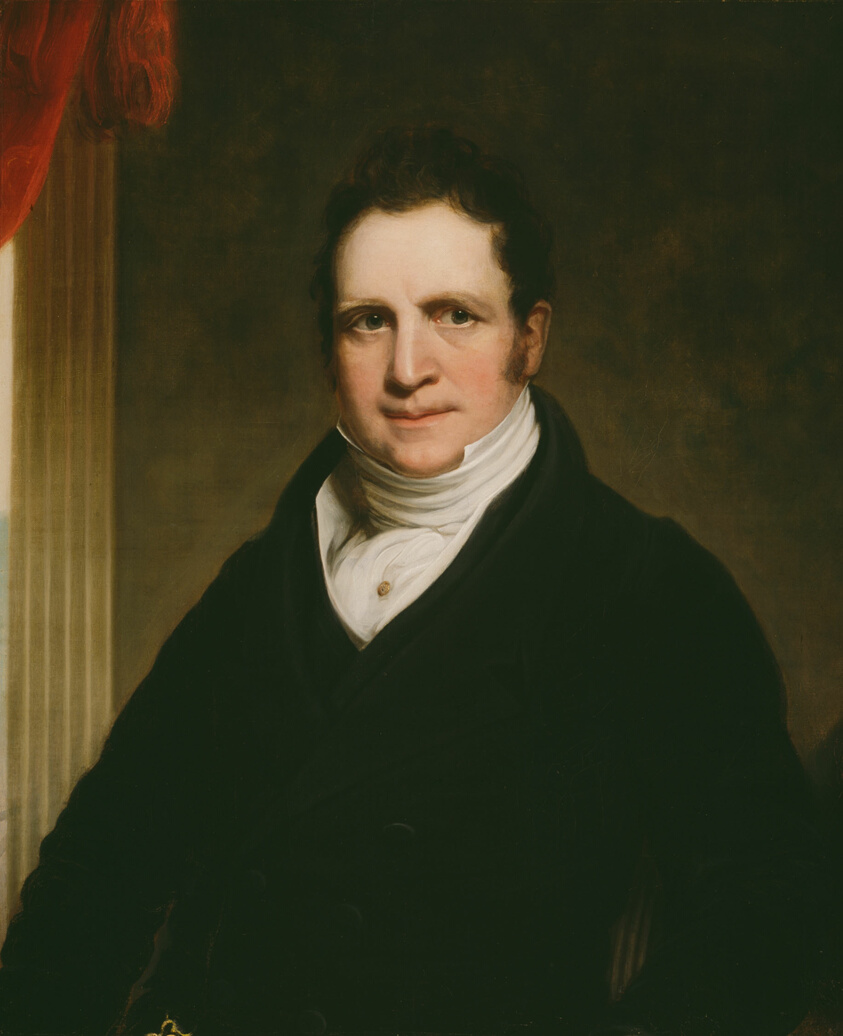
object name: Painting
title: Thomas Abthorpe Cooper (1776-1849)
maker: Chester Harding (American, 1792–1866)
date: c. 1822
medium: Oil on canvas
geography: United States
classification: painting; american arts